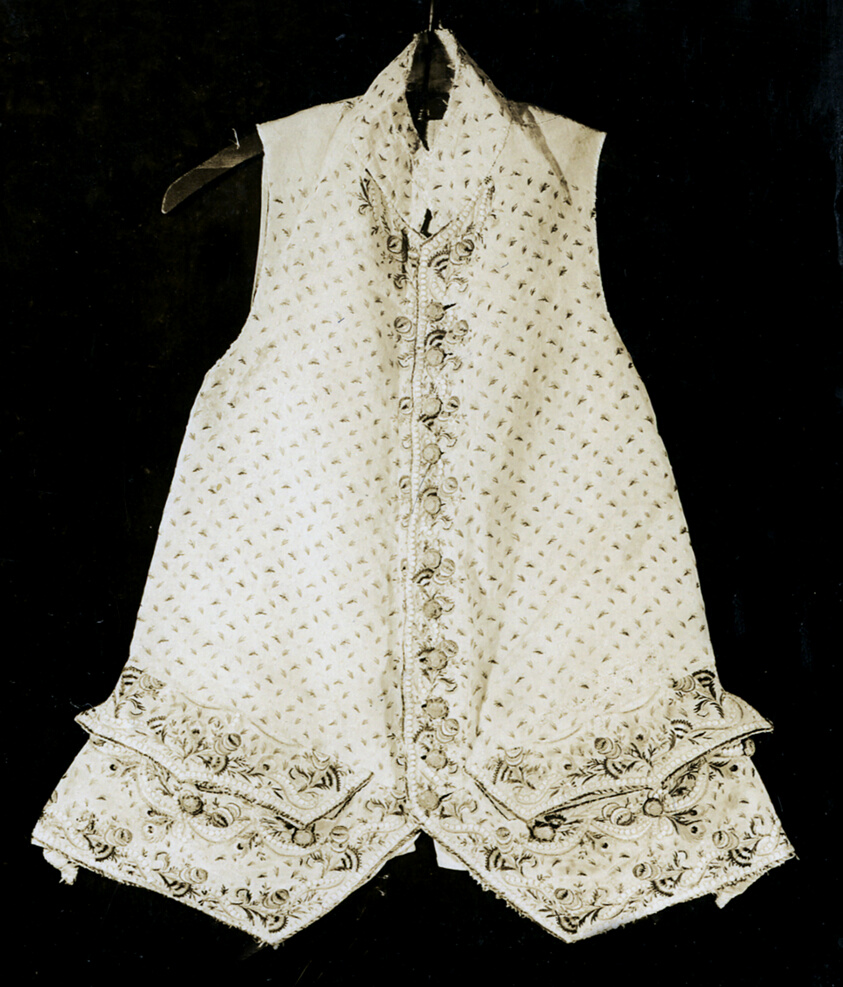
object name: Costume and Accessories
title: Waistcoat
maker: France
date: 18th century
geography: France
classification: textile; needlework (visual works); costume; dress (garment); clothing